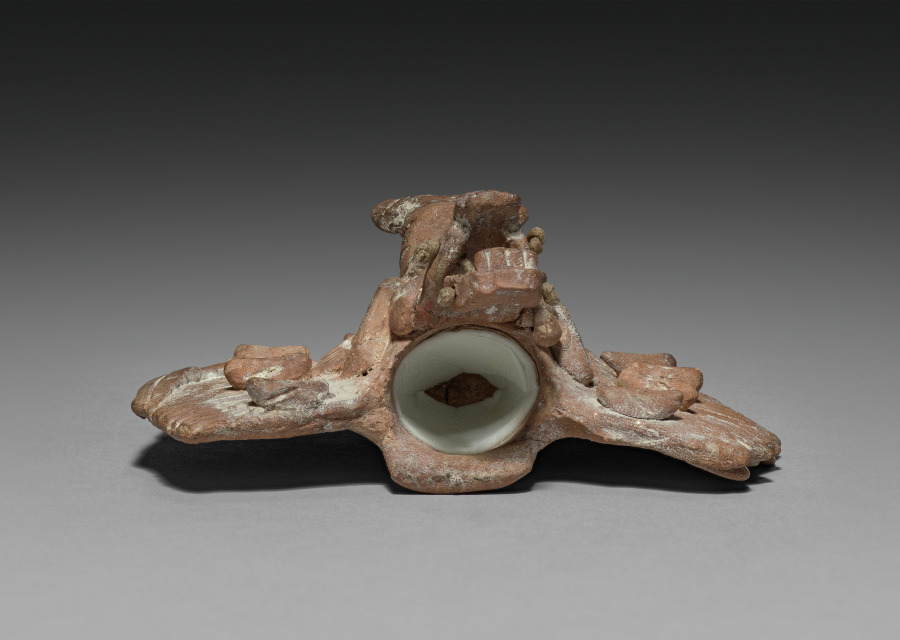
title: Seated Lord with Removable Headdress: Headdress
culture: Mesoamerica, Maya, probably Jaina Island, Late Classical period, 7th-9th century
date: 600–800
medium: ceramic and slip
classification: Ceramic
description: The major Maya grave offerings on Jaina Island were ceramic figurines that depict deities and humans in a variety of roles. The headdress belongs to a seated figure who represents a male, perhaps another warrior, who wears a huge zoomorphic headdress. A skeletal face with articulated jaw descends from the headdress to fit as a mask over the figure’s face.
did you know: It is estimated that some 20,000 people were buried on the tiny island of Jaina over a 500-year period.